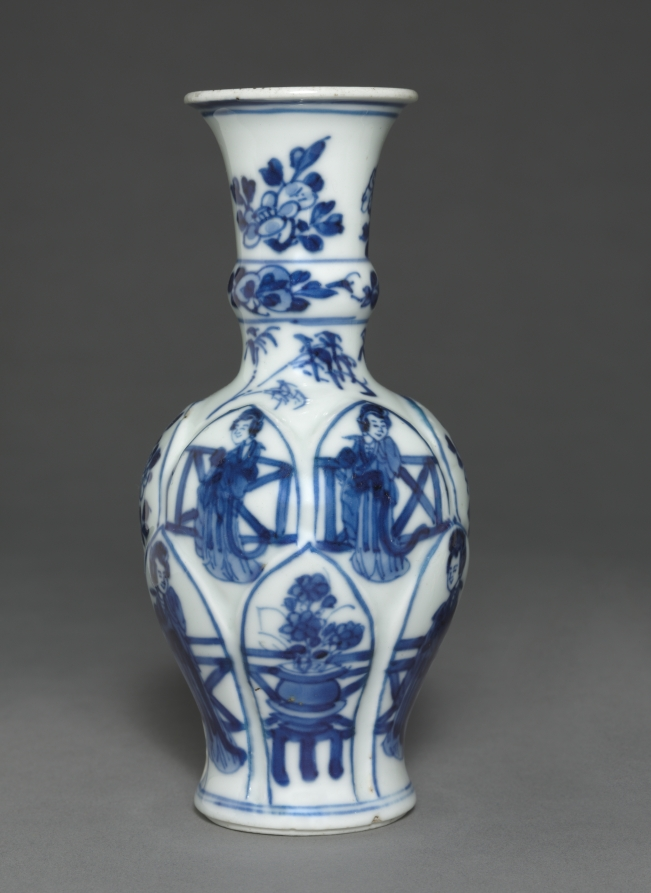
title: Vase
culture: China, Qing dynasty (1644-1911), Daoguang reign (1821-1850) - Xianfeng reign (1851-1861)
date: 19th Century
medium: porcelain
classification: Ceramic